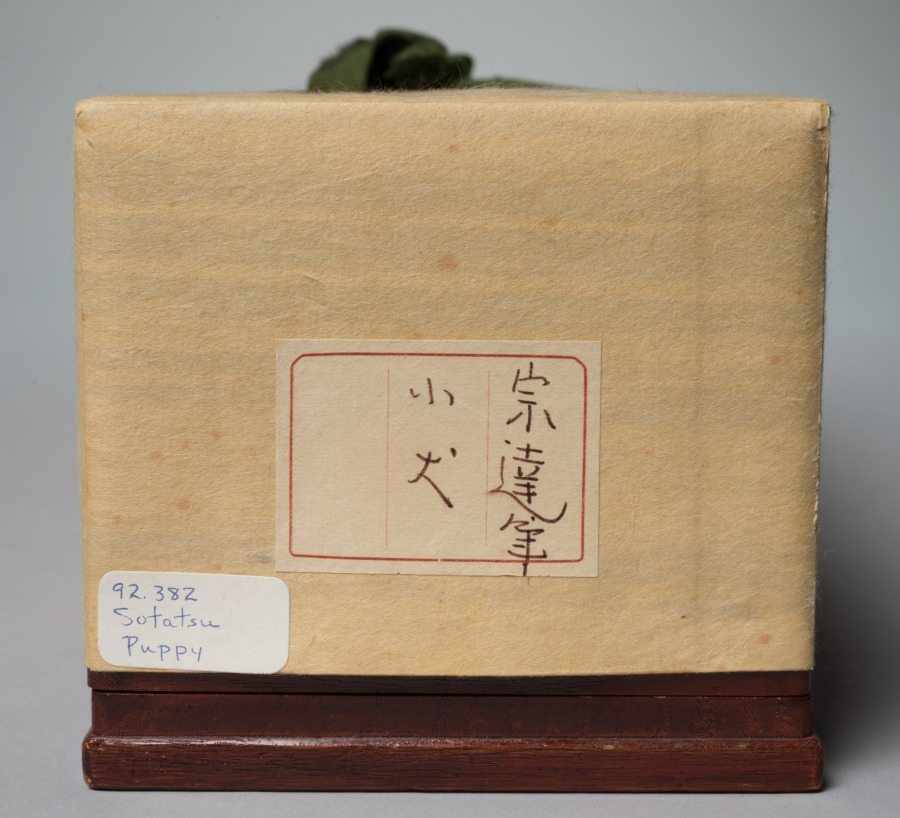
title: Puppy with Dandelions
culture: Japan, Edo period (1615–1868)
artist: studio of Tawaraya Sōtatsu (Japanese, c. 1570–c. 1640)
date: 1600–1640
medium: hanging scroll; ink on paper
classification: Painting